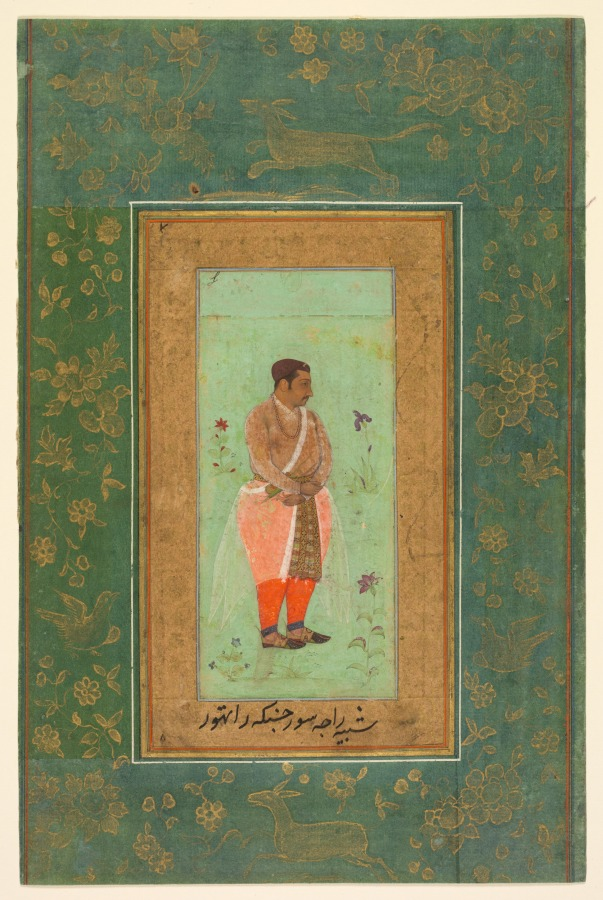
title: Portrait of Suraj Singh Rathor, Raja of Marwar and Maternal Uncle of Shah Jahan: A Page from the Prince Khurram Album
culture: India, Mughal court, early 17th century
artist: attributed to Bishandas (Indian, active c. 1610–30)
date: c. 1600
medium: Gum tempera and gold on paper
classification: Painting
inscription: inscribed in hand of Shah Jahan in lower inner border: shabihi Raja Suraj-Singh Rathor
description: This true-to-life portrait depicts the maternal uncle of the Mughal prince Khurram (1592-1658), who would later become the emperor Shah Jahan. His clothing and accessories-especially the six-pointed wrapped tunic made of prized translucent muslin-reveal his wealth and status. The artist’s skillful brushwork conveys the varied textures of the fabrics and sensitively renders his patient, somewhat weary expression. Prince Khurram selected this painting for inclusion in an album he assembled in 1612. Suraj Singh was a Hindu prince from Marwar, a Rajput kingdom under the auspices of the Mughal empire. His sister, a Marwar princess, was the third wife of the Mughal emperor Jahangir. Intermarriage with Hindu families is one example of the ecumenism of the early Mughal emperors, who adhered to a liberal form of Islam. Suraj Singh died of natural causes while on a military campaign with Prince Khurram in the Deccan in 1619.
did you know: Emperor Shah Jahan himself wrote the label inscription under the painting.